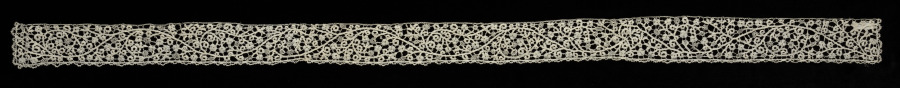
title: Lace Edging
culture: Italy, Milan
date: 1500s–1600s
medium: Linen: bobbin lace (cantu)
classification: Lace